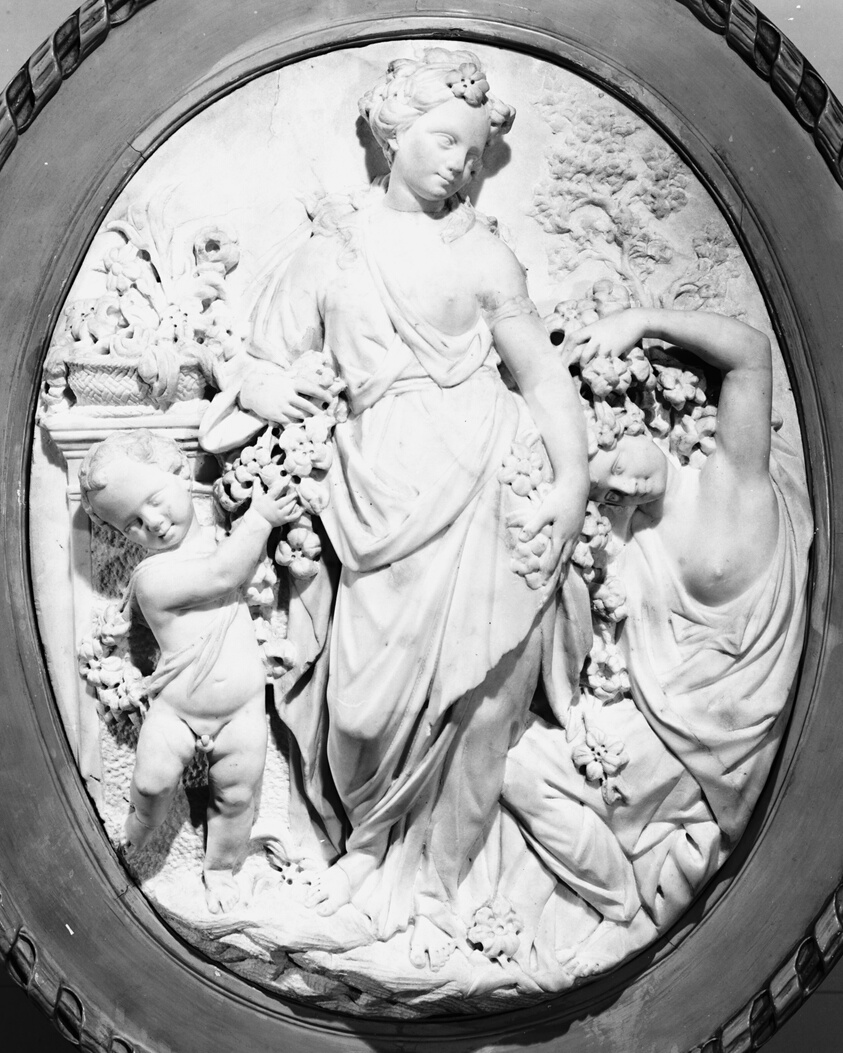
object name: Sculpture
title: Allegory of Spring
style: nineteenth century, 19th century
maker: Artist unknown (English, active 19th century)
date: 1800/25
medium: Marble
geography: England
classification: relief; sculpture; sculpture/stone; marble; british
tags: seasons, basket, cherubs, columns, flowers, foliage, grapes, nudes, trees, vines, woman, women, wreaths